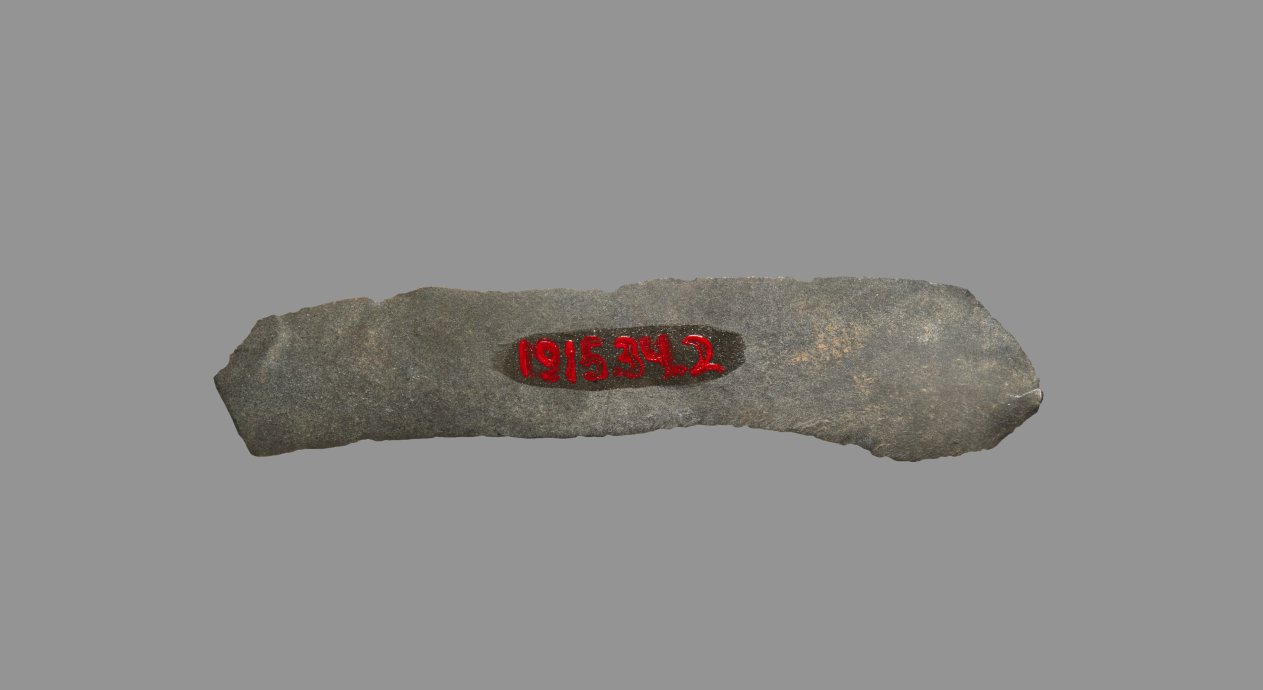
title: Sickle Blade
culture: Egypt, Middle Kingdom (2040–1648 BCE), Dynasty 12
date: 1980–1801 BCE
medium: flint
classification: Implements